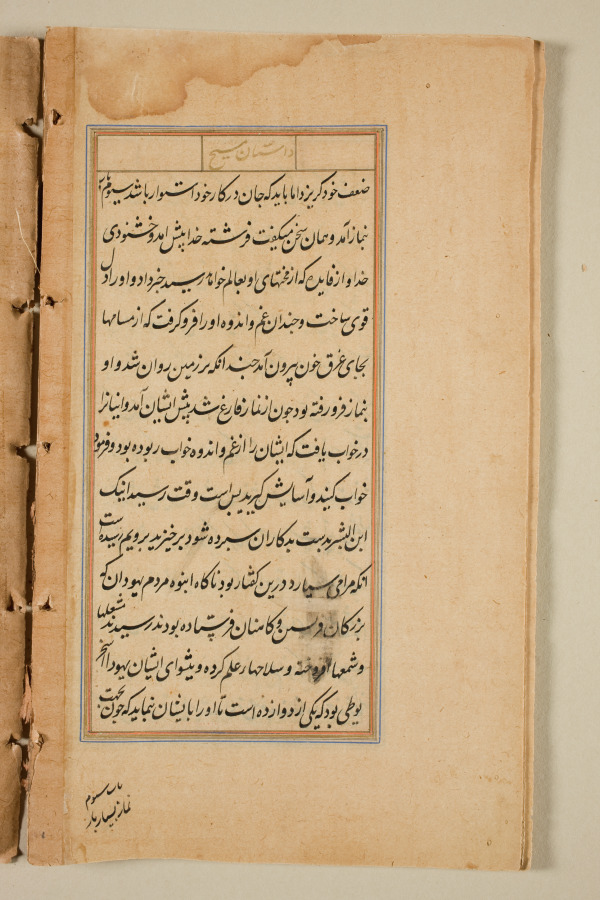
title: Text page from a Mirror of Holiness (Mir’at al-quds) of Father Jerome Xavier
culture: Mughal India, Allahabad, made for Prince Salim (1569–1627)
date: 1602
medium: Ink and gold on paper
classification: Manuscript